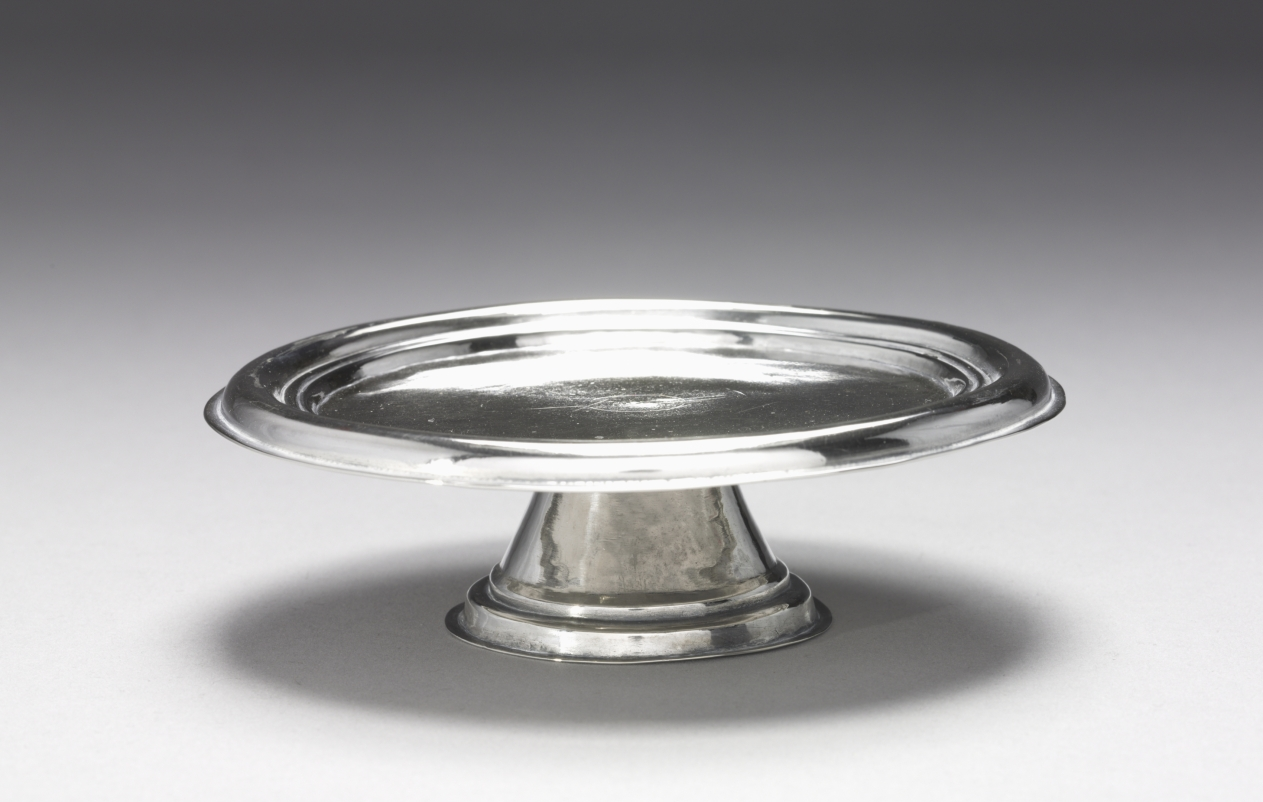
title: Footed Salver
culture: America, Massachusetts, Boston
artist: John Dixwell (American, 1680–1725)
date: 1710–20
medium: silver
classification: Silver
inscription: engraved, all in shaded block letters underneath salver: "B" over "N*D" opposite "E*S."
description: A serving tray used for one cup or glass.